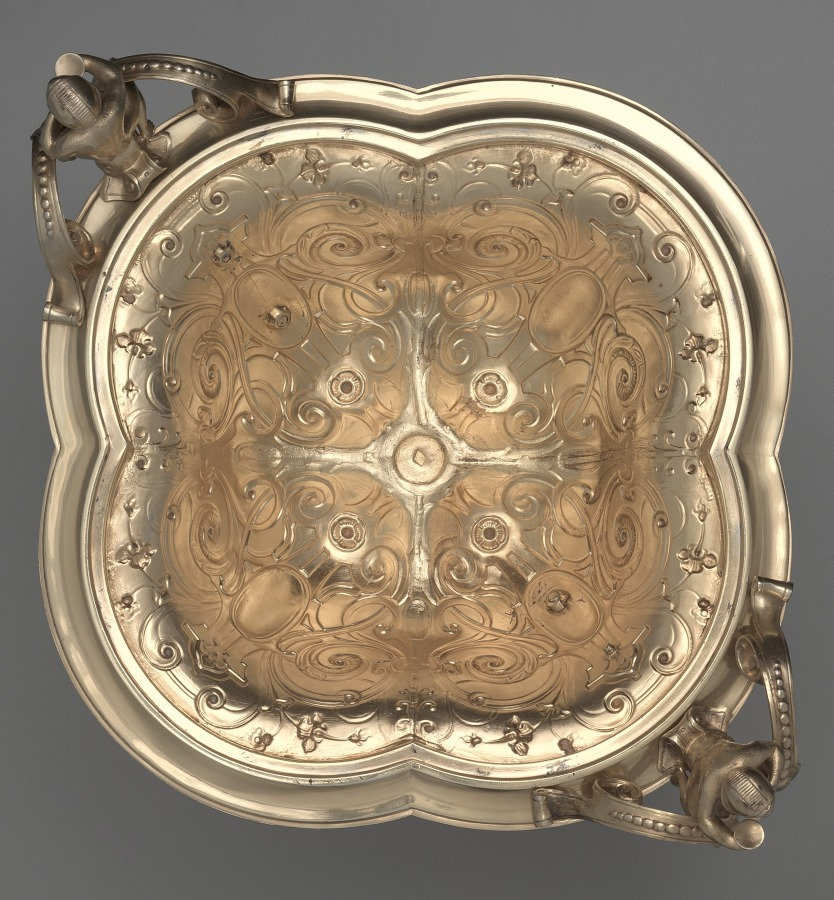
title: Centerpiece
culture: France, 19th century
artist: Charles-Nicolas Odiot (French, 1826–1868)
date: 1838–1848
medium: silver gilt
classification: Metalwork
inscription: engraved inside base: "ODIOT ORFEVRE DU ROI A PARIS"; engraved beneath crowns: "LP" (conjoined for King Louis Philippe of France).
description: Made for Louis Philippe (1773-1850), King of France 1830-48.